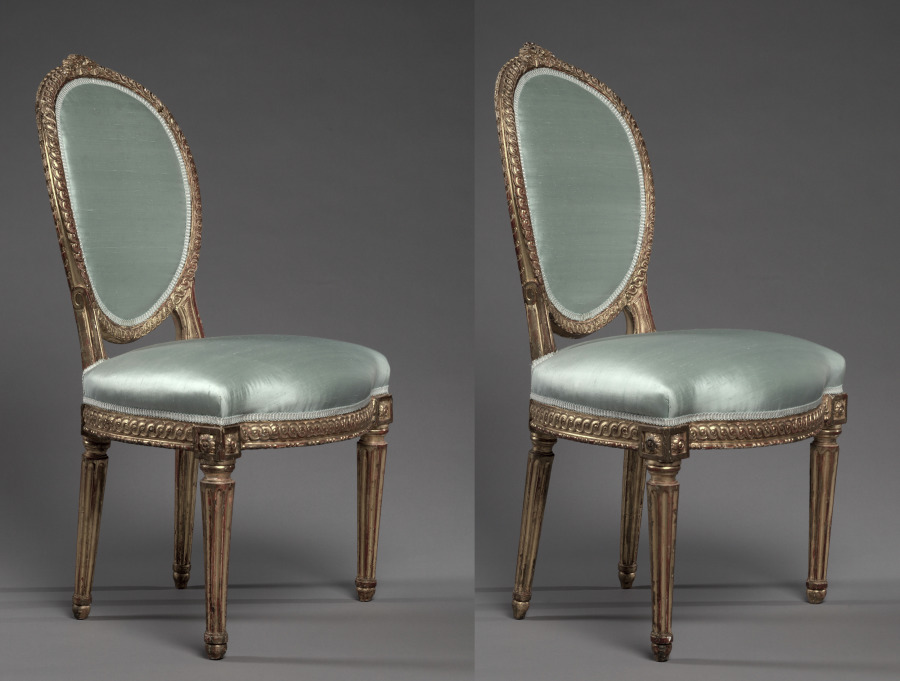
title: Pair of Side Chairs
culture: France, style of Louis XVI, 18th century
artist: Jean Baptiste fils Lelarge (French, 1743–1802)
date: 1700s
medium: gilded wood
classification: Furniture and woodwork